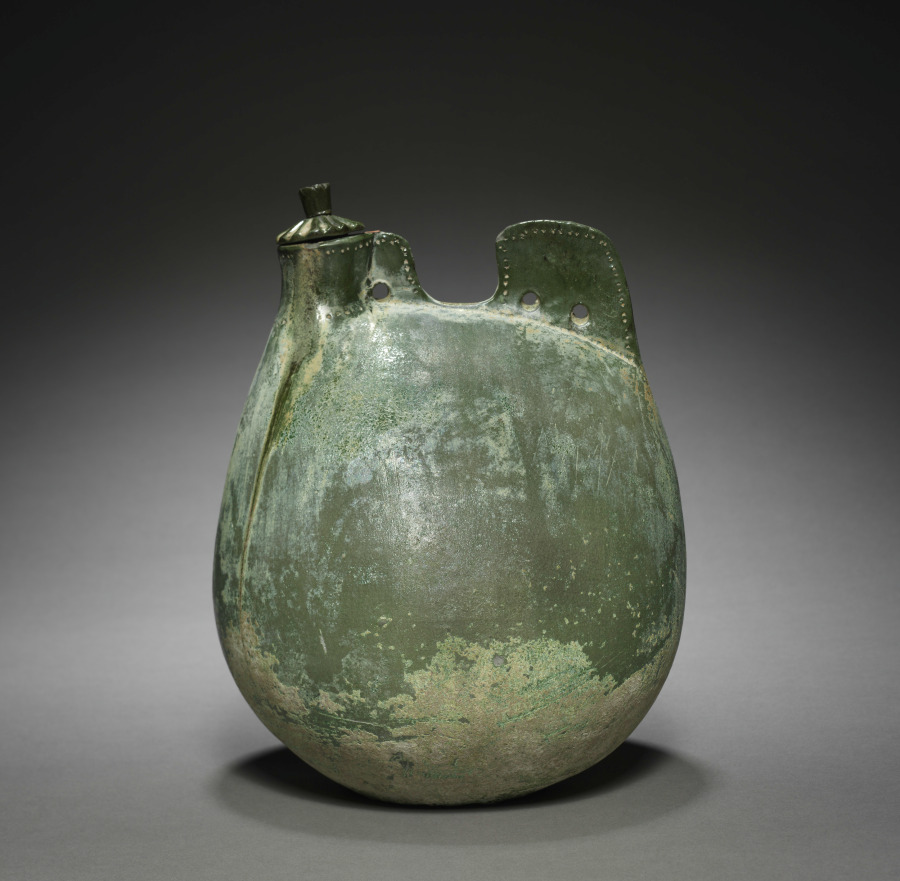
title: Leather Bag-Shaped Flask with Cover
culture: Northeast China, Liao dynasty (916-1125)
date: 916–1125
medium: earthenware with green glaze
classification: Ceramic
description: Flasks like these derive their shapes from leather bags; even the edges are finely rouletted to resemble the seams of sewn leather. These were used by the nomadic Khitan people who established the Liao kingdom in Inner Mongolia, Manchuria, and North China. Such wares represented the Liao adoption of the Tang Chinese ceramic tradition, and yet they expressed ethnic identity and new innovations resulted from the cultural borrowing.